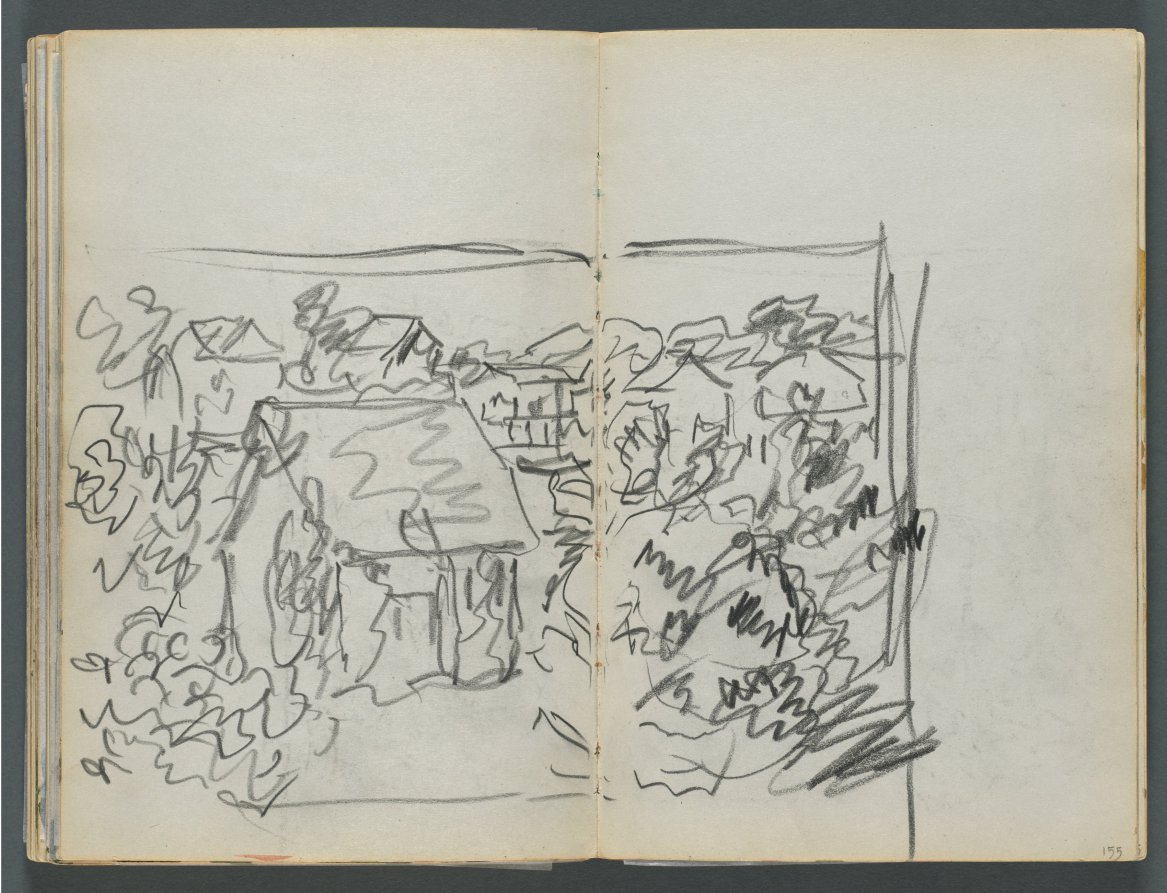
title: Sketchbook, The Dells, N° 127, page 154 & 155: Landscape with Houses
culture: America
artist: Maurice Prendergast (American, born Newfoundland [now Canada], 1858–1924)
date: c. 1919–1921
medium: graphite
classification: Bound Volume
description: This sketchbook contains 59 pages of graphite drawings and 16 watercolors made at various locations on Cape Ann, Massachusetts.